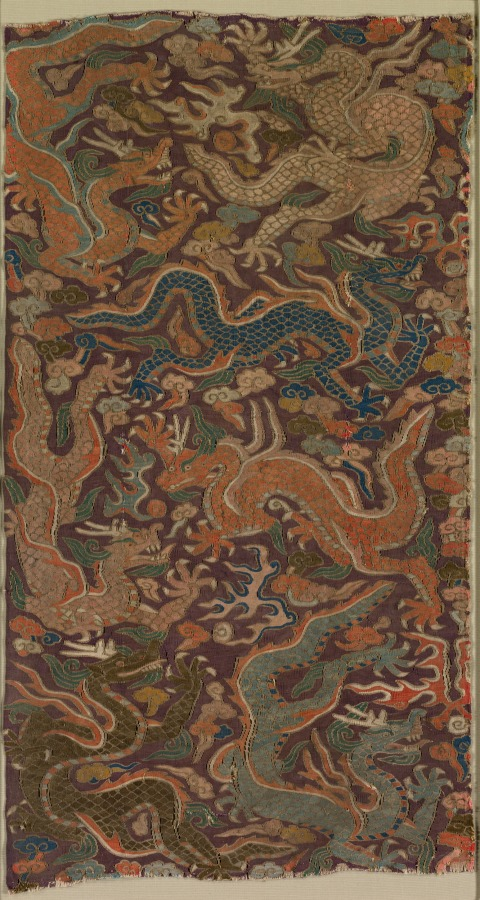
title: Dragons Chasing Flaming Pearls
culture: Central China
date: 1200s or earlier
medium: silk and gold thread: tapestry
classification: Textile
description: This rectangular, reversible tapestry (kesi) fragment, woven with silk and metal thread on a deep purple ground, is a section from yardage likely intended for a garment, but no contemporary paintings exist to confirm this. A selvage edge remains on the left; having an extant selvage edge provides us with information about the loom on which this textile was woven. The design motif of this kesi—dragons chasing flaming pearls—is Chinese. But the form of the dragons and the way they are crowded together is not Chinese. Rather than animals and birds among flowers, a frequently occurring pattern in the decorative art of eastern Central Asia that long predated the Mongol conquest, here the dragons are chasing flaming pearls. This deviation is indicative of the powerful influence of the Mongols.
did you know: The metal thread used in this weaving is fabricated from very thin strips of parchment with applied gold and silver leaf that are then wound around a core of yellow silk.